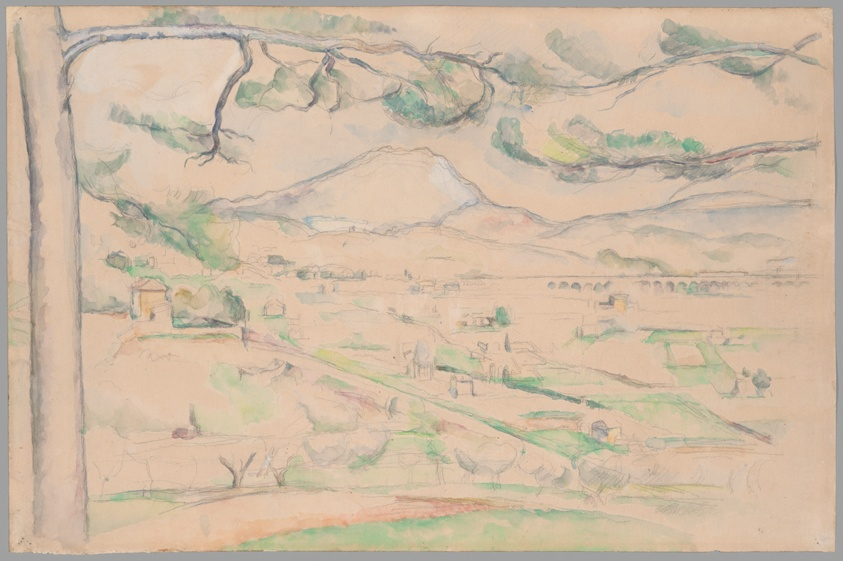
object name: Drawing and Watercolor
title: Montagne Saint-Victoire (The Arc Valley)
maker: Paul Cézanne; French, 1839-1906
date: c. 1885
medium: Watercolor, with graphite, on buff wove paper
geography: France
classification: watercolor; drawings (visual works); prints and drawing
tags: landscapes